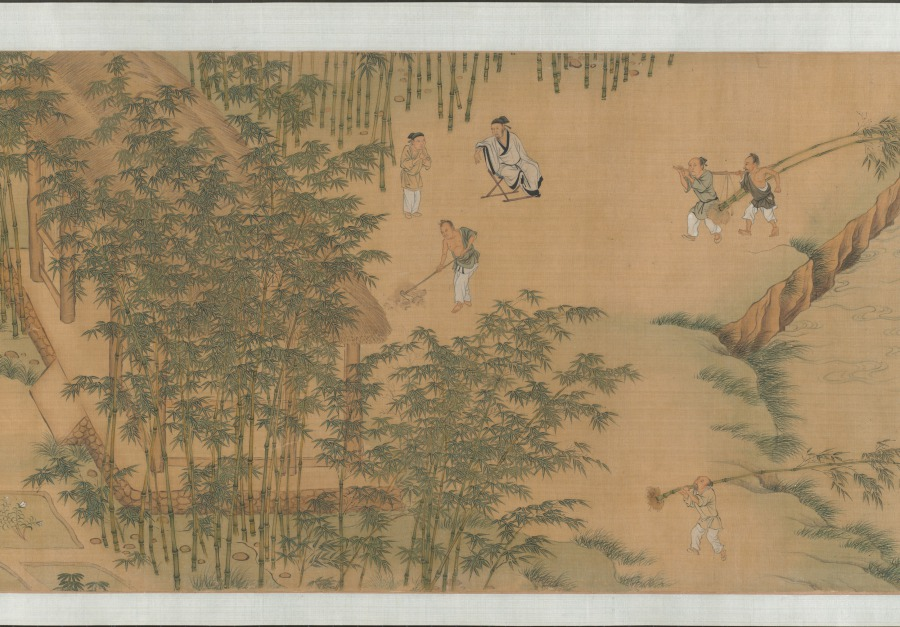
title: Garden for Solitary Enjoyment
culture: China, Ming dynasty (1368–1644)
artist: Qiu Ying (Chinese, 1494–1552)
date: 1515–52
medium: Handscroll; ink and light color on silk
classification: Painting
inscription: Accompanying text of an essay together with seven poems of Sima Guang (1019–1086) and one poem of Su Shi (1037–1101) written by Wen Zhengming (1470–1559) in 1558.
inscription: 2 colophons and 82 seals: 4 seals of Wen Zhengming 文徵明 (1470–1559); 59 seals of Xiang Yuanbian 項元汴 (1525–1590); 1 colophon, dated 1644, and 7 seals of Xiang Yukui 項禹揆 (c. late 1500s–1659); 1 colophon, dated 1880, and 2 seals of Weng Tonghe 翁同龢 (1830–1904); 2 seals of Ch'eng Chen-i (19th c.); 1 seal of Han Ch'ung (19th c.); 4 seals of Wan-go H. C. Weng 翁萬戈 (1918–2020); 3 seals unidentified.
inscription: Colophon by Xiang Yukui 項禹揆 (c. late 1500s–1659): The painting of The Garden for Self-enjoyment on the right by Shih-chou, Mr. Qiu [Qiu Ying] is in the style of Li Lung-mien. Its mood is peaceful, as if meeting the ancient gentlemen face to face among the brushes and silk; it lifts one above the sordid bustle of life. Formerly, my late father handed me this scroll which had only the painting without the written essay. I considered asking a good calligrapher to write the essay to add to it but was afraid that the quality of the writing would not match the painting. Several years later, I saw at a friend's house this essay and poems (of Ssu-ma Kuang] written by Hengshan [Wen Zhengming], once owned by my grandfather; so I spared no expense to obtain it. I rejoiced at this and said: "The divine swords are finally united. How things are pre-destined!" Now my friend Chang Kung-chao's technique for mounting [painting and calligraphy] is excellent. Therefore by daring to take them out and join them together, I can preserve this beautiful story of singular reunion. Xiang Yukui recorded at Hai-yeh-t'ang [hall] two days before New Year's Eve in the jiasheng year of the Chongzhen era [1644]. trans. LYSL/HK/WKH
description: Garden of Solitary Enjoyment refers to a site built in 1073 by the statesman Sima Guang (1019–1086) after he had retired to Luoyang, Henan province. Every spring, visitors would flock to his garden. Each of its seven structures references a historic figure. Sima wrote: I channel streams [like Du Mu], to water flowers [like Bai Juyi], or trim bamboo [like Wang Huizhi]. . . . I know of no joy between heaven and earth that could take its place. Qiu Ying’s painting, created after an 11th-century version of the same theme, must have appealed to garden owners of the Ming dynasty, since it became the template for numerous Suzhou workshop copies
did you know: Sima Guang completed his monumental survey of Chinese history, Zizhi tongjian, in the garden depicted in this painting.